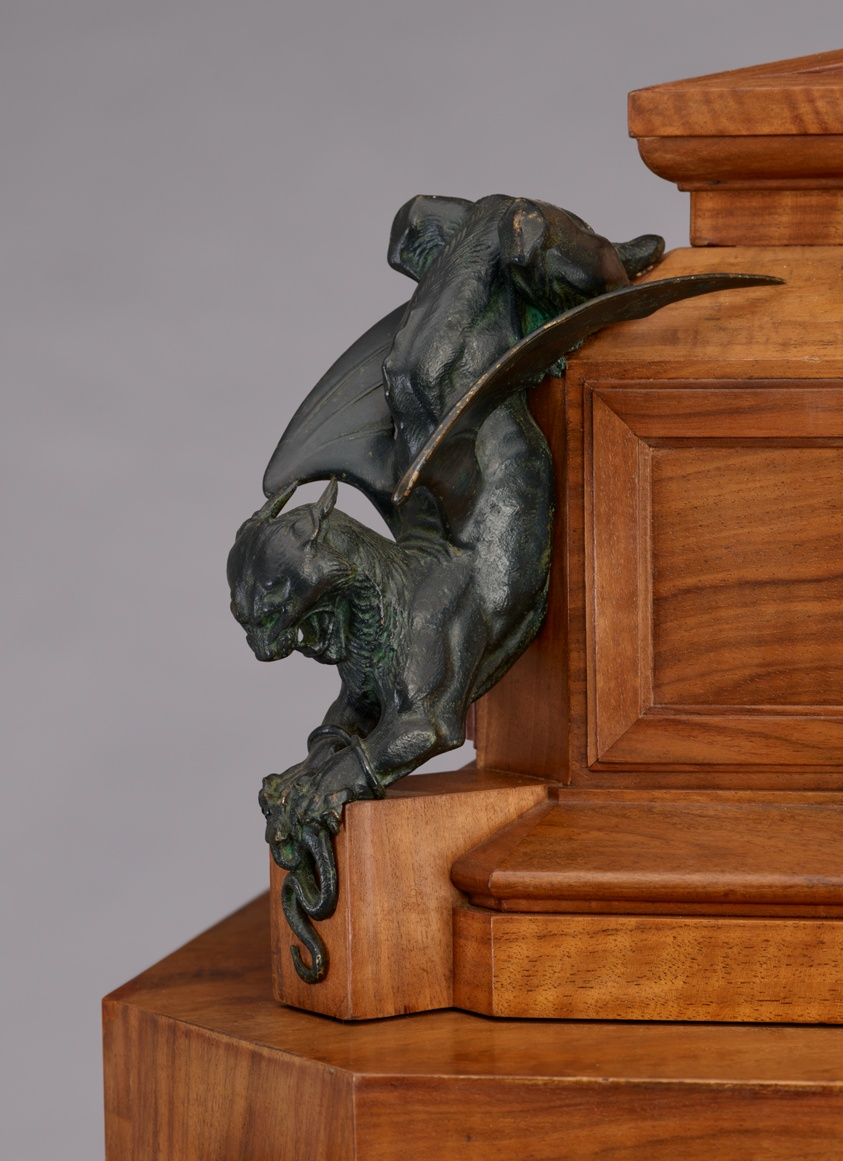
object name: Furniture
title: Cigar Cabinet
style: Neogothique, 19th century, gothic revival, merovingian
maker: Made by Charles-Guillaume Diehl (German, active in Paris, 1811–1885); Designed by Jean-Eugene Brandely (French, active 1867–1873); Bronzes modeled by Emmanuel Fremiet (French, 1824–1910); Paris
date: c. 1867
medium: Oak, cedar and walnut veneers, patinated bronze, and caning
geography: Paris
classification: furniture; humidor; european decorative arts; cabinet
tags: lizards, merovech, merovee, quatrefoil, smoking, cigars, tobacco